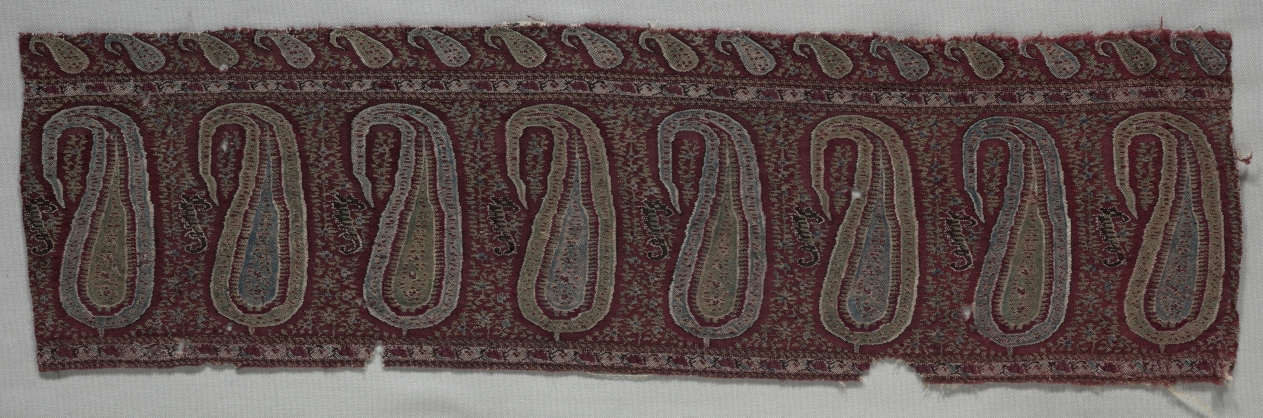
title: Border of a Shawl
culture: India, Punjab, 19th century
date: 1800s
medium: tapestry twill; wool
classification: Textile